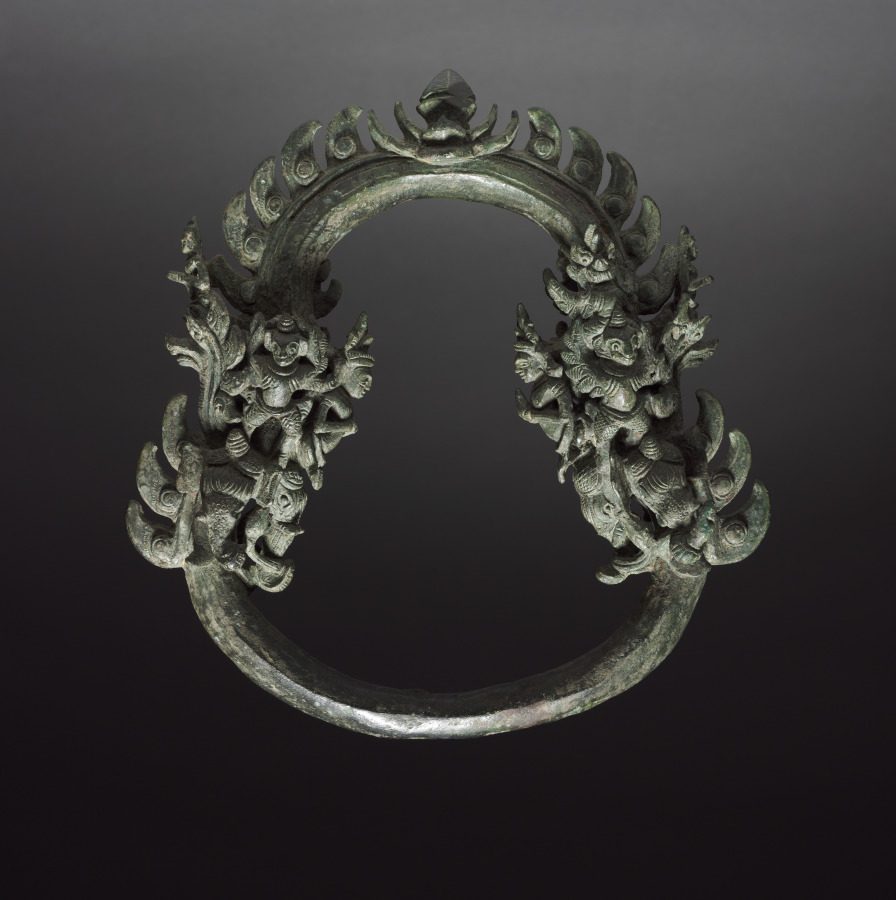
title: Palanquin Ring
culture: Cambodia, probably Angkor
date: 1100s–1200s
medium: bronze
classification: Sculpture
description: When members of the royal family or priesthood traveled in a public festival procession to make offerings at a temple or participate in a ceremony, they would be carried in a palanquin, or a covered litter. Portable objects of veneration, such as bronze images or a sacred fire, were also carried on palanquins. The palanquins had wooden poles, hanging seats or raised platforms, and bronze fittings cast in intricate forms and gilt, lending the palanquins a sumptuous quality. This ring, which supported a suspended seat, would have hung on a hook attached to a wooden pole. The body of the ring is shaped in the form of a pair of nagas, or serpents. The flanges, or protrusions, on the top and sides are stylized spines of the serpent’s body, and the heads rear up on either side. In a richly textured cluster of separately cast figures on both sides of the ring are images of composite bird-human, monkey-human, and elephant forms.